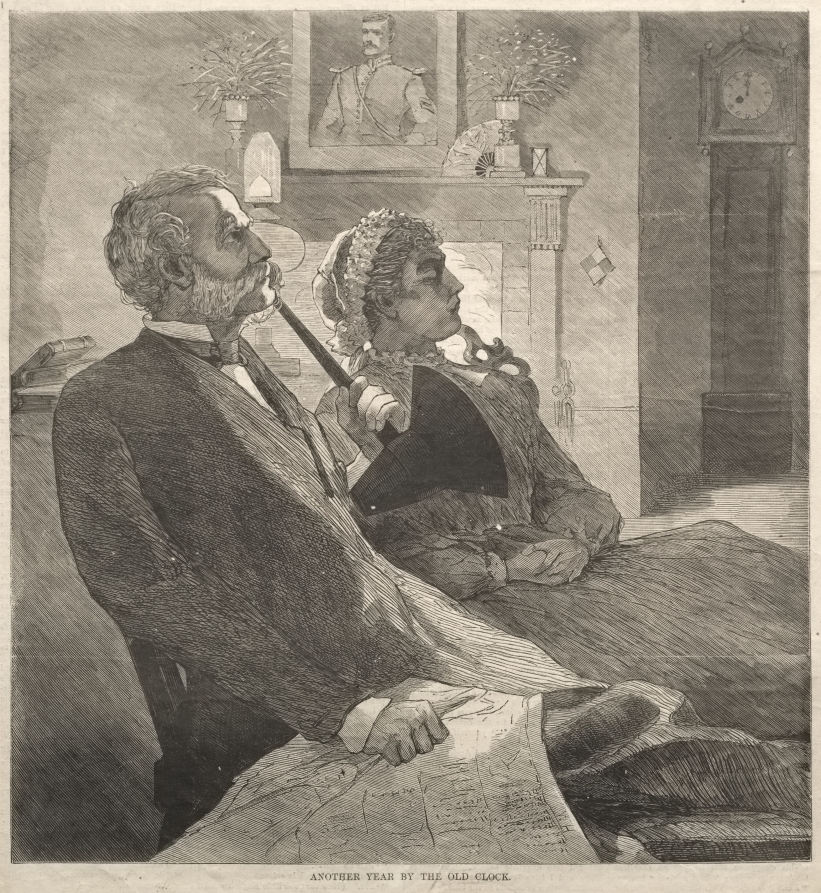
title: Another Year by the Old Clock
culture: America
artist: Winslow Homer (American, 1836–1910)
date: 1870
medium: wood engraving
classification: Print